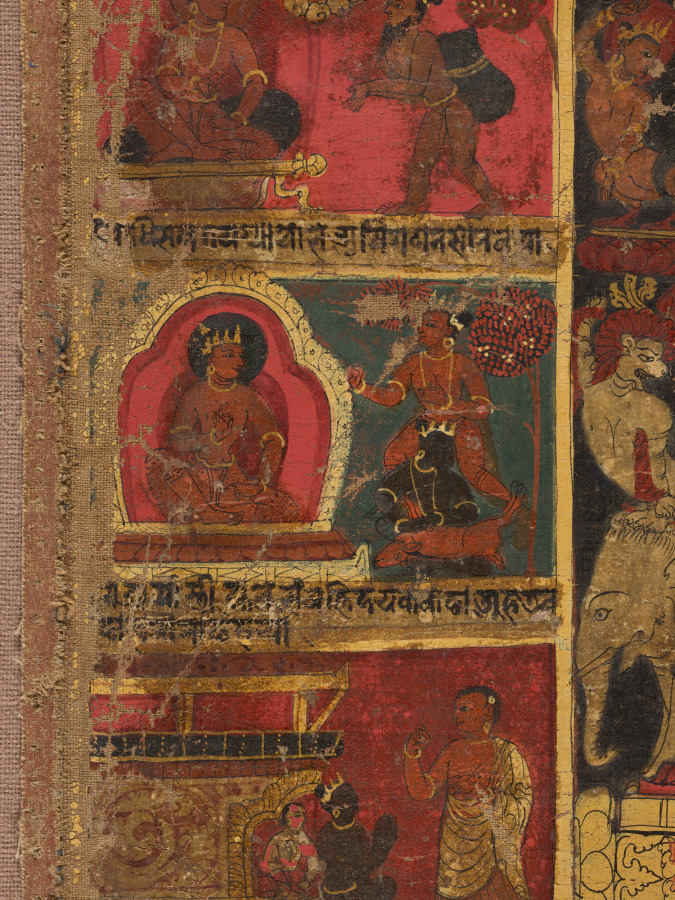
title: Bejeweled Buddha Preaching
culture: Nepal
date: 1648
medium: Gum tempera, ink, and gold on cloth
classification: Painting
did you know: Nepalese devotional paintings on cloth are called "paubha" in the Newari language.